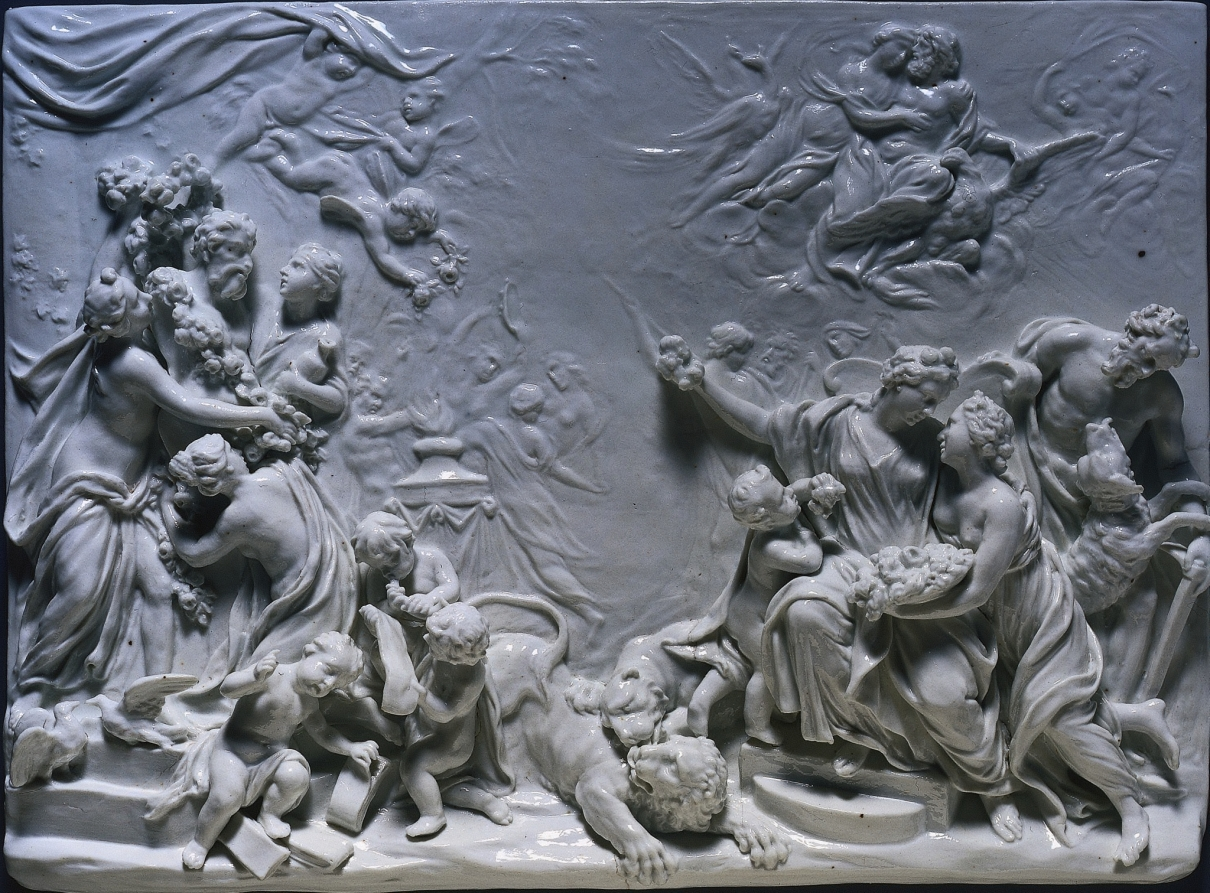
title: Spring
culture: Italy, near Florence, mid-18th century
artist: Doccia Porcelain Factory (Italian)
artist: after a design by Massimiliano Soldani (Italian, 1656–1740)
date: mid-1700s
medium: porcelain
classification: Sculpture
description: Although most 18th-century European porcelain factories produced three-dimensional works, these were often small figures intended to ornament dinner tables or mantelpieces. The factory at Doccia outside Florence was more ambitious, turning to baroque sculptors of the great local tradition to supply models for works in porcelain. In 1743 the factory purchased from the heirs of the famous Florentine sculptor Massimiliano Soldani (1656-1740) a number of that artist's models. Included were models for a series of reliefs representing the four seasons that were created by Soldani in 1708 for Ferdinando de' Medici. One of the reliefs was Spring, or The Realm of Flora, which was then executed in porcelain.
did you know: This relief representing spring includes many creatures: lions, a dog, and an eagle can all be spotted.